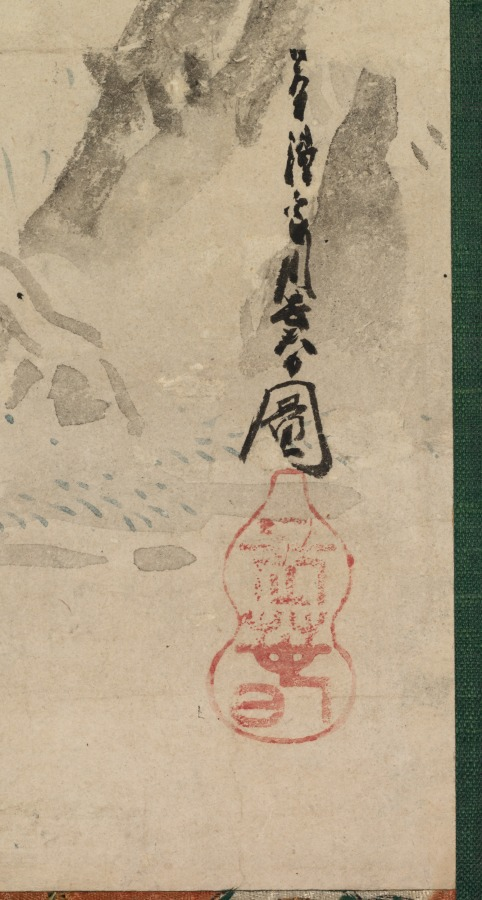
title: Spring Dancers (Manzai)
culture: Japan, Edo period (1615–1868)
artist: Miyagawa Chōshun (Japanese, 1683–1753)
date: early to mid-1700s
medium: hanging scroll; ink and color on paper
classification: Painting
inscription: Artist's signature and gourd-shaped seal lower right corner.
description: Manzai is the Japanese term for wandering comic dancers. The painting depicts one of the traditional pleasures of the spring season.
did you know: One performer is playing a hand-held drum, like CMA 1918.349.